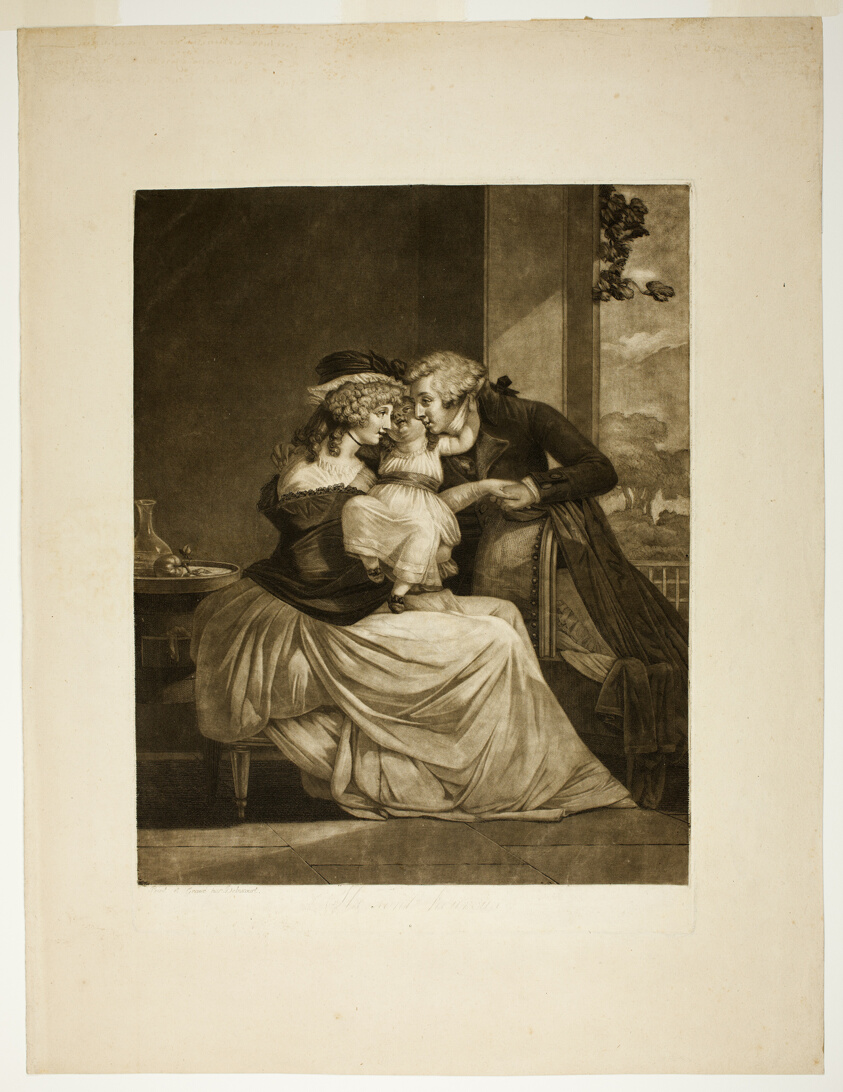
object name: Print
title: They Are Happy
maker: Philibert Louis Debucourt (French, 1755-1832)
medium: Mezzotint, with etching and engraving, on cream laid paper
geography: France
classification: mezzotint; print; prints and drawing